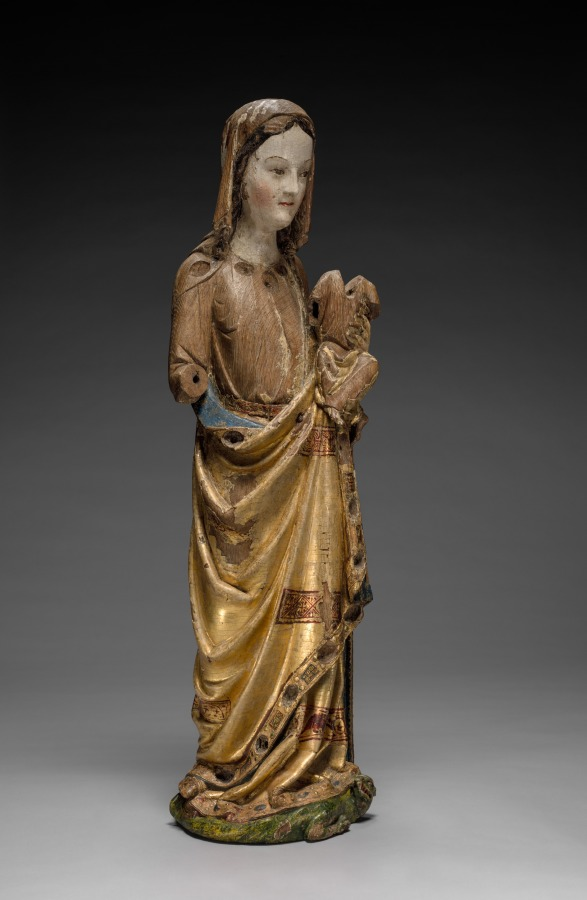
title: Virgin and Child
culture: Mosan (Valley of the Meuse), Liège(?), late 13th century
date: late 1200s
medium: wood (oak) with polychromy and gilding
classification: Sculpture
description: This sculpture is a rare survival in wood from the valley of the Meuse River (modern Belgium and Holland), an important region for the production of ecclesiastical art in the 1100s and 1200s. The elegantly draped figure is remarkable for the preservation of much of its original paint and gilding, including the Virgin's gilded mantle highlighted with decorative bands of geometric patterns and the green dragon on which she stands. There are small settings around the Virgin's neck and along the border of the mantle that would have originally been set with gem and glass cabochons in imitation of the richly adorned metalwork for which Mosan art was highly esteemed. The settings for these cabochons provide some hint of the original opulence of this sculpture. The Virgin's serene features and beautiful countenance are noteworthy, as is the refined execution of the draperies.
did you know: Dragons, like the one Mary is standing on, sometimes look more like snakes in medieval art.